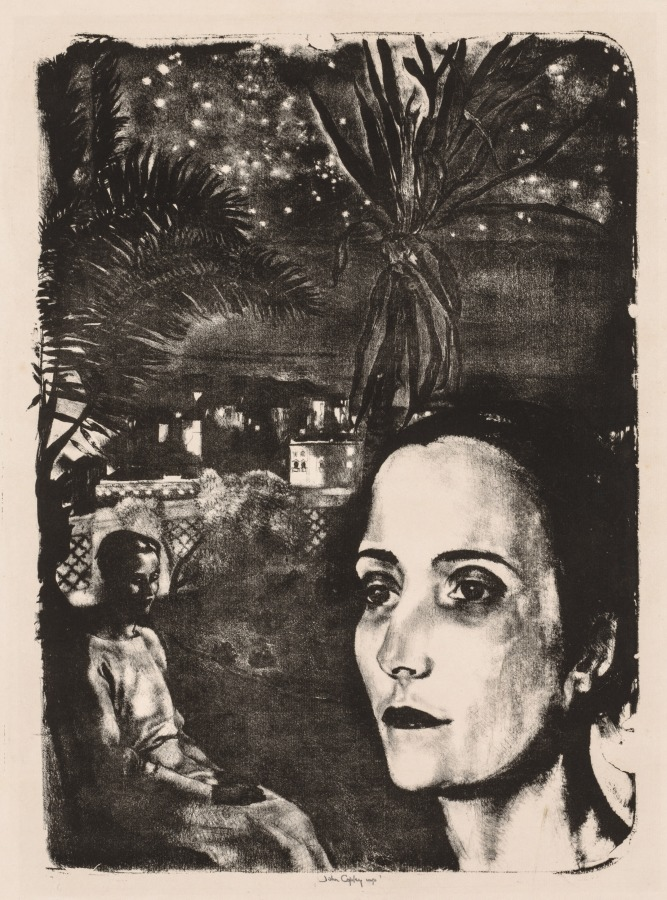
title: Starry Night, Alassio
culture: England, 20th century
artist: John Copley (British, 1875–1950)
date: 1928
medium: lithograph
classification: Print